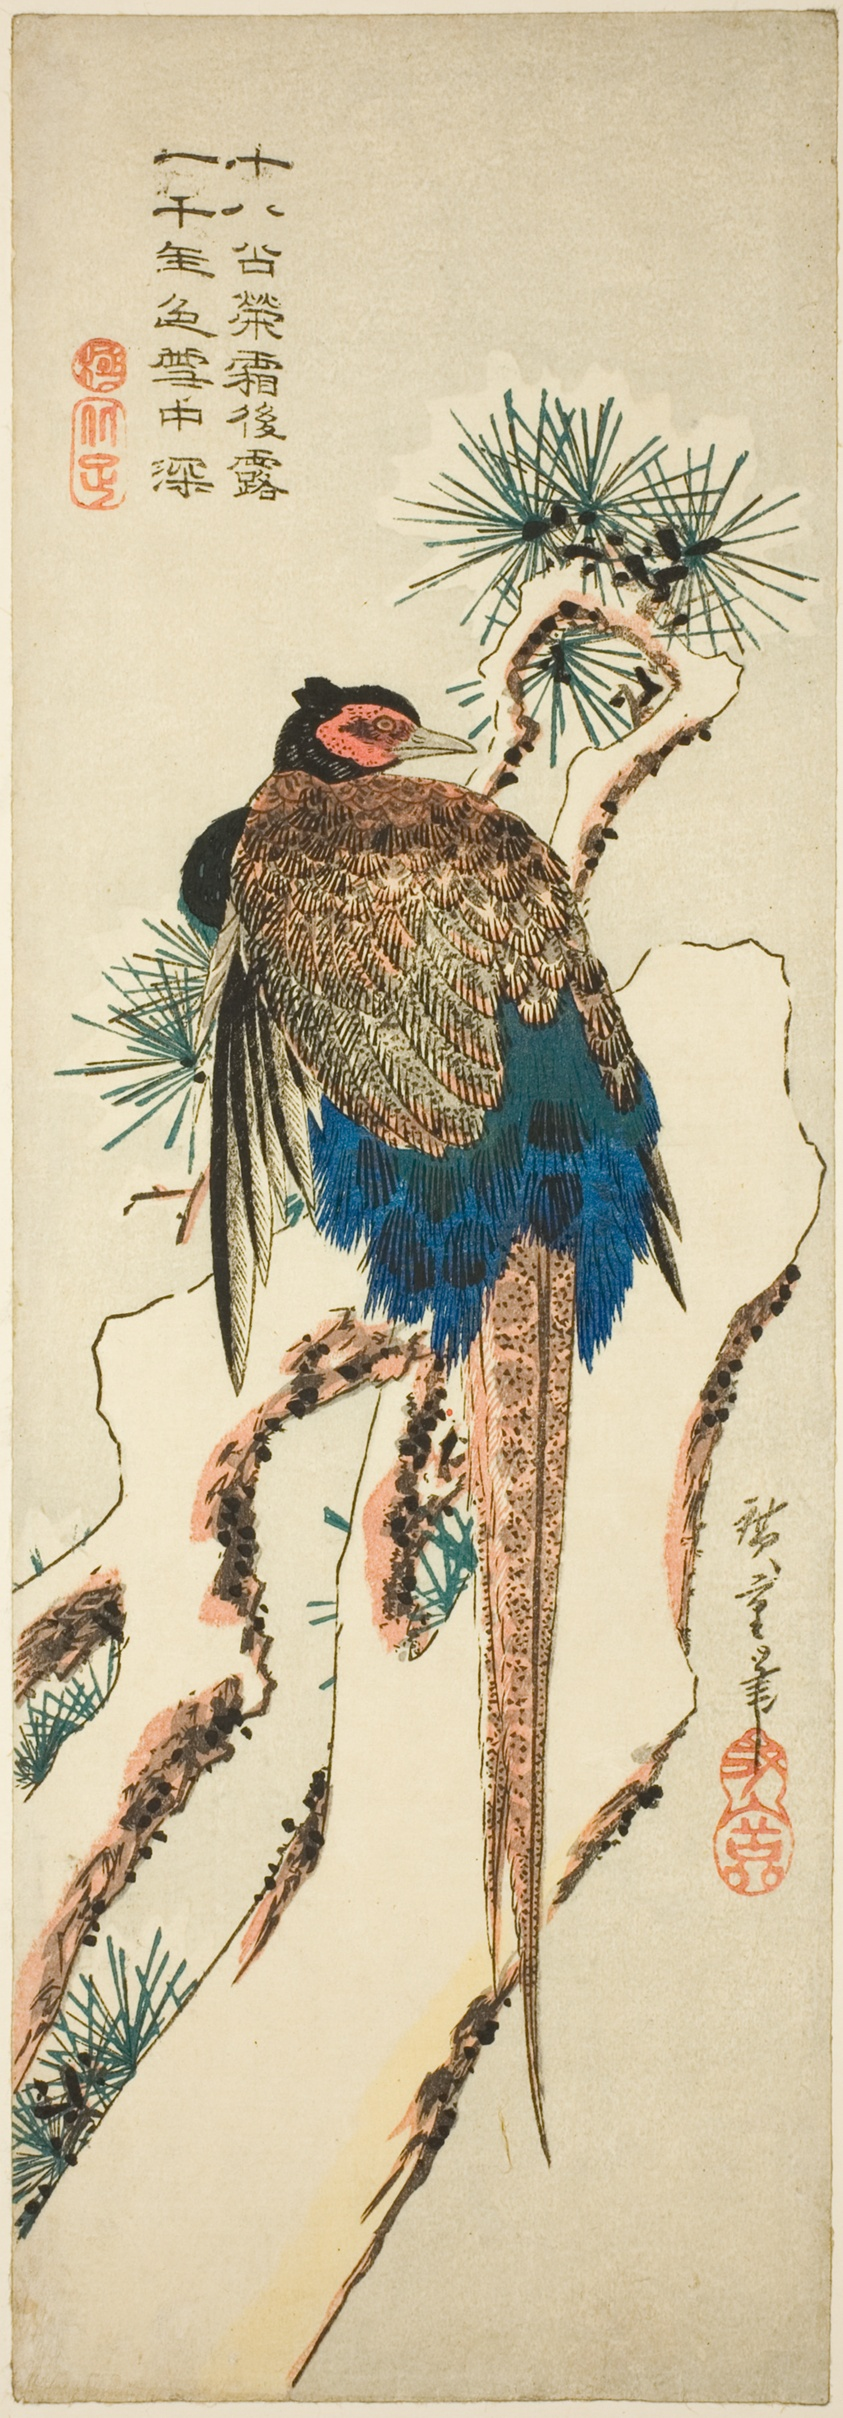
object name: Print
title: Pheasant on a Snow-Covered Pine Tree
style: Japanese (culture or style)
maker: Utagawa Hiroshige 歌川 広重; Japanese, 1797-1858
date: mid–1830s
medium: Color woodblock print; chu-tanzaku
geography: Japan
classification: woodblock print; print; asian art